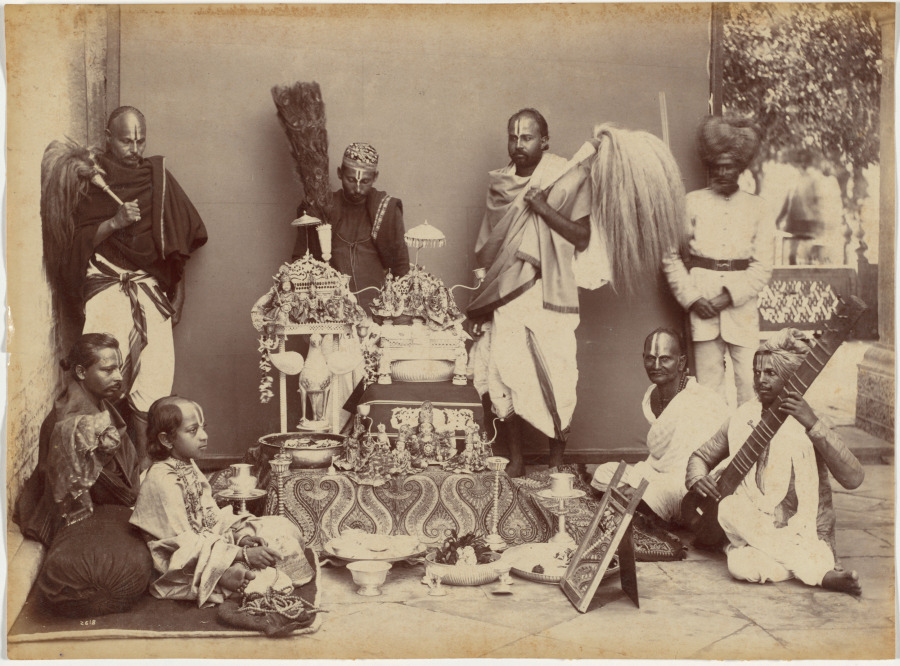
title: Maharaja of Rewa in Prayer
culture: India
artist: Raja Deen Dayal (Indian, 1844–1905)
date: 1886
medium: albumen print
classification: Photograph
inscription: Stamped in black ink on verso: “28.7A”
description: Performing religious devotions was part of a maharaja’s duty to protect his kingdom. Praying before an altar, the maharaja fingers prayer beads and sits opposite a mirror, an auspicious object in Hindu worship. The lines painted on the men’s foreheads indicatethat they are devotees of the Hindu god Vishnu. This group portrait demonstrates three ways rulers serve the state: by being a military commander, a worldly scholar, and, in this image, an observant Hindu.